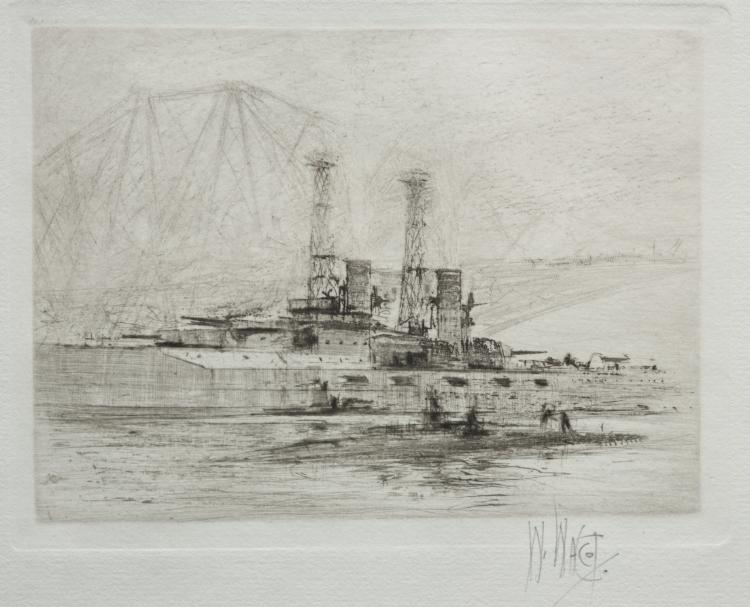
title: U. S. S. Delaware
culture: England, 20th century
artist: William Walcot (British, 1874–1943)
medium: etching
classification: Print